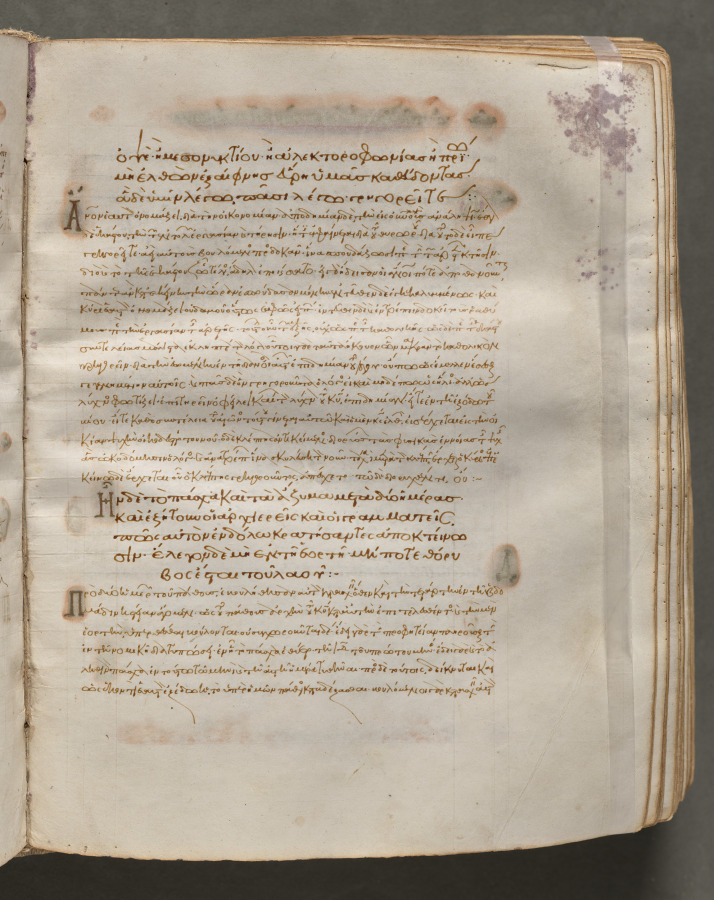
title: Text, folio 186 (recto), from a Gospel Book with Commentaries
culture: Byzantium, Constantinople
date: c. 1000–1100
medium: ink, tempera, and gold on vellum; leather binding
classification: Bound Volume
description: Each of the four gospels in this book opens on a page with brilliantly illuminated borders depicting the author of the text as well as birds-principally peacocks, symbols of the immortality of the soul-and fountains, representing the fountain of life and the salvation of the soul. This volume consists of 428 leaves with texts in Greek. Its level of sophistication suggests that it was probably written and decorated in a monastery in Constantinople.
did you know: Gospel Books were carried in procession through Byzantine churches.